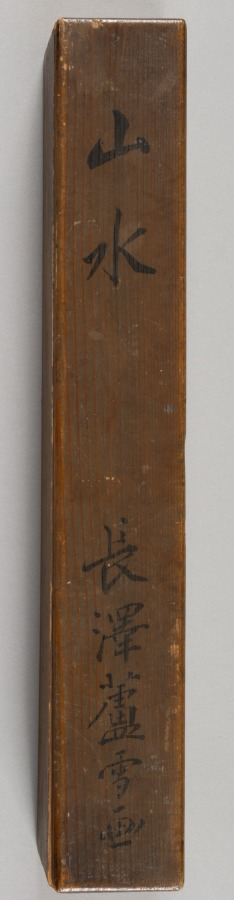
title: Mountains and Distant Boats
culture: Japan, Edo period (1615–1868)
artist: Nagasawa Rosetsu (Japanese, 1754–1799)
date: late 1700s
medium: hanging scroll; ink and slight color on paper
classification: Painting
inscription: Signed: 蘆雪; Sealed: 引裾